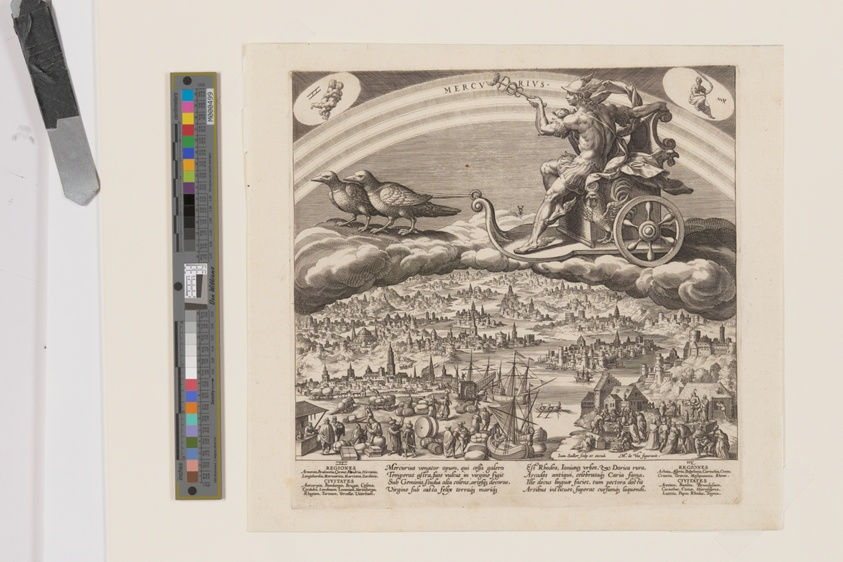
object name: Print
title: Mercurius, from The Seven Planets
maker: Jan Sadeler I (Flemish, 1550–1600); after Maarten de Vos (Flemish, 1532–1603)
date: 1585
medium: Engraving on ivory laid paper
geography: Flanders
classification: engraving; paper; print; prints and drawing